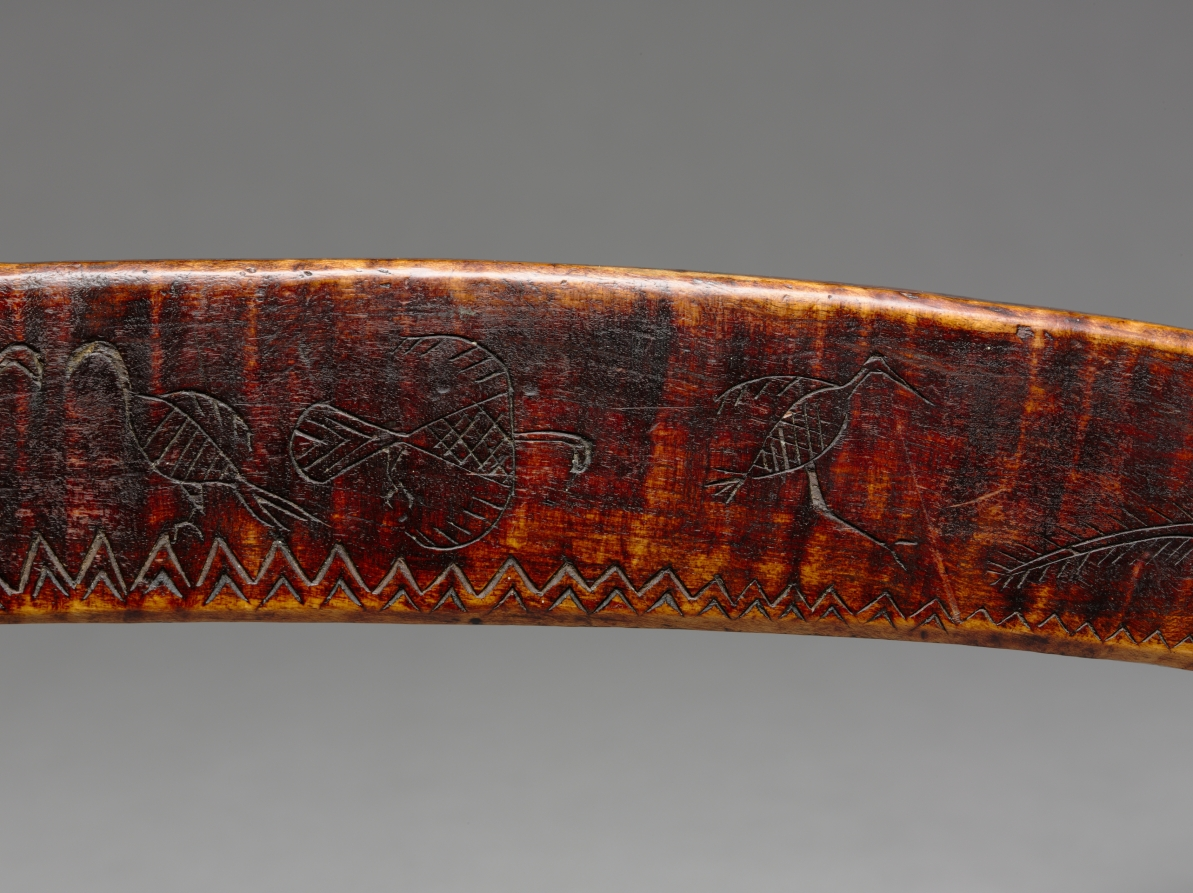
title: Ball-Headed War Club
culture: Native North America, Northeastern Woodlands, Great Lakes, Anishinaabe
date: late 1700s–early 1800s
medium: wood (maple?)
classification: Implements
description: The ball at the striking end of this club is clenched in an abstract, jawlike form that likely refers to a protector animal who endowed the owner with power. Incised on the shaft is a rich record of doodemag (singular, doodem, “totem”)—animals representing other-than-human progenitors from which Anishinaabe peoples trace their descent. (The Anishinaabeg, a group of related Great Lakes nations, include the Odawa, Ojibwe, Potawatomi, and others.) Included is an antlered creature, perhaps a caribou, along with mammals, birds, and powerful spirit beings: the thunderbird, its wings outstretched, and perhaps the long-tailed underwater panther. When this example was made, clubs had become symbols of status and earlier ways of life, having been replaced as favored weapons by metal tomahawks and European firearms. Today, clubs are part of powwow regalia.